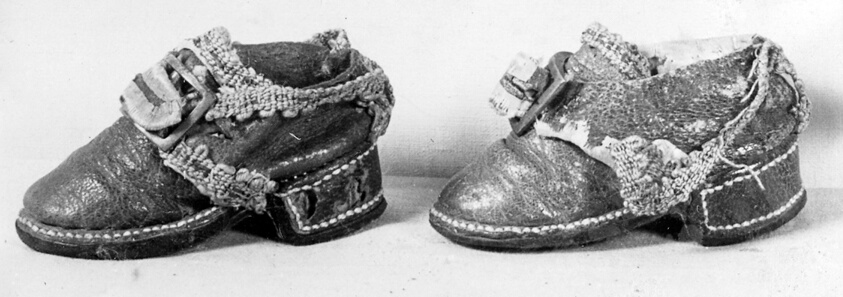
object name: Textile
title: Doll's Shoes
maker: England or France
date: 18th century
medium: Leather and gallon and buckle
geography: England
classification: textile; shoes - misc; costume accessory - shoe